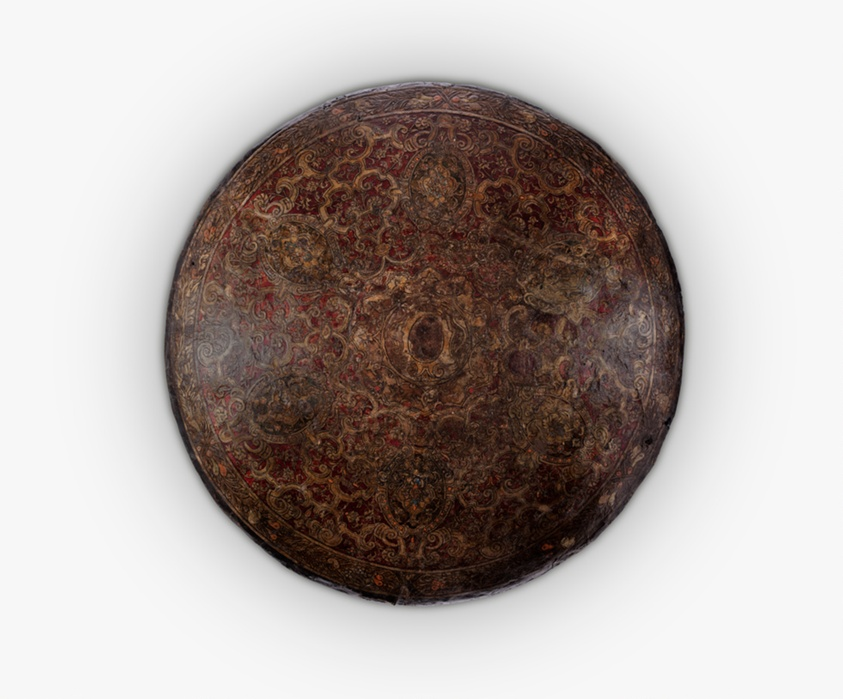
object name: Armor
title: Shield for the Bodyguard of Wolf Dietrich von Raitenau, Prince-Archbishop of Salzburg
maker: Italian, Venice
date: 1590/1600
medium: Wood, leather, varnish, silver foil, and polychrome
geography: Venice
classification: shield; armor; arms and armor